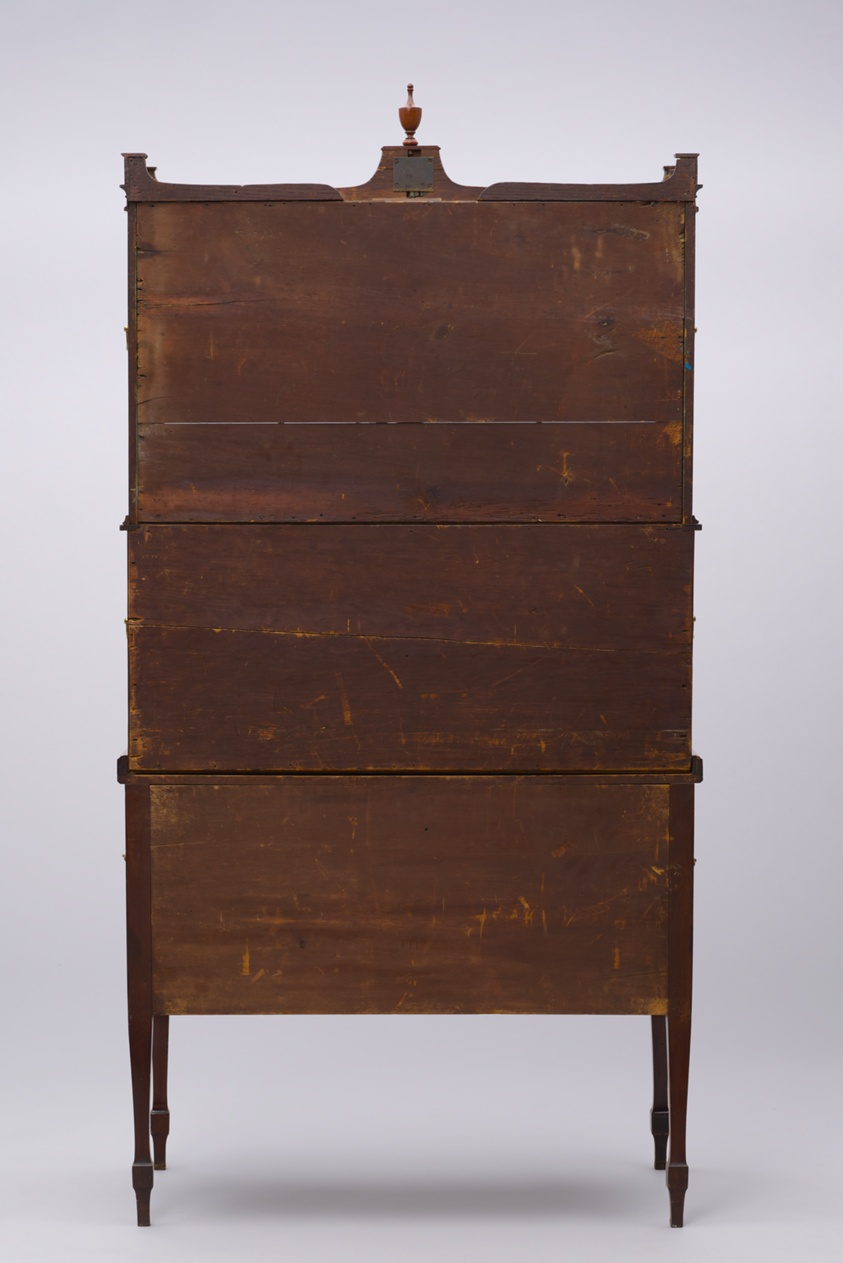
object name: Furniture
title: Tambour Desk and Bookcase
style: federal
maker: Attributed to the workshop of John and Thomas Seymour (American, active 1793–1804); Or attributed to the workshop of Thomas Seymour (American, active 1804–1817); Boston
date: c. 1800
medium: Mahogany, satinwood, white pine, cherrywood, chestnut, with brass, ivorine, and leather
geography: Boston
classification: furniture; american arts; american decorative arts; bookcase; decorative arts; desk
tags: furniture, cabinets, shelves, drawer, locks, keys, bookcase, decorative arts, desk, escutcheons